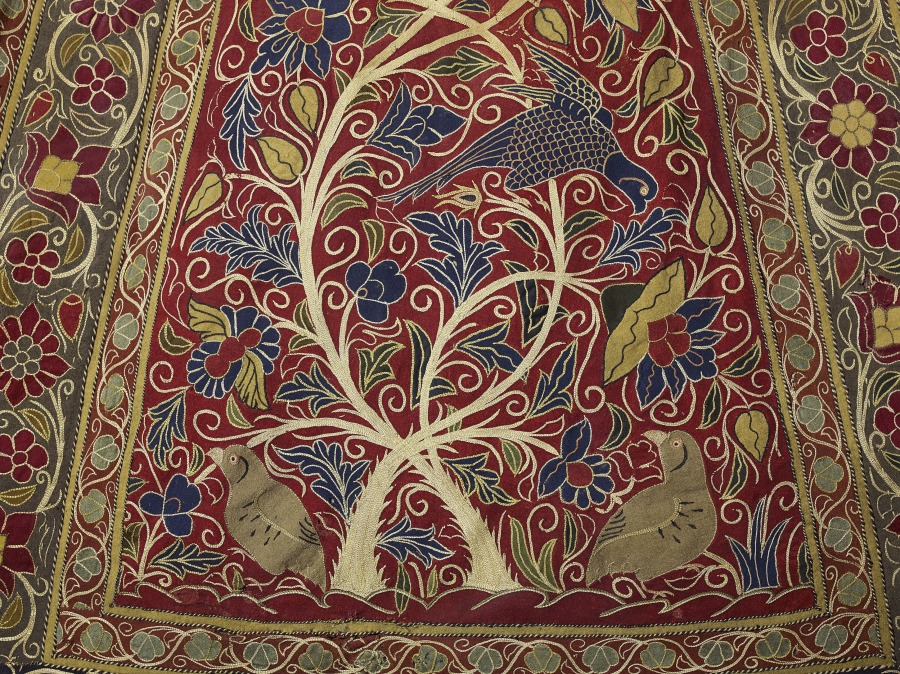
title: Royal Round Tent made for Muhammad Shah (Roof)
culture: Iran, Rasht, Qajar period (1779-1925)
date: 1834–48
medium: Interior: wool: plain weave, inlaid work; silk: embroidery, chain stitch; tape, leather; Exterior: cotton, wool: plain weave; rope, iron ring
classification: Textile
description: Royal tents were potent symbols of authority, wealth, and power throughout the greater Middle East. Rulers owned thousands of tents. They were used for shelter, shade, and innumerable functions in tent compounds that were essential for imperial ceremonies, travel, and military campaigns. Distinguished by size with elaborately decorated interior walls and ceilings, tents could be as large as castles. Opulent tents were also presented as imperial gifts. Tents are only known through documents before 1600. For example, in Baghdad in 809, Caliph Harun al-Rashid owned 4,000 ceremonial tents and 150,000 camping tents that were stored in the imperial Abbasid treasury. An astonishing variety and quantity of tents were housed in the royal Fatimid tent storeroom in Cairo in 1068-69, including "military tents, fortress tents, and castle tents, manufactured of . . . gold-brocaded stuff embroidered with designs of elephants, wild beasts, horses, peacocks, birds." Since 1600, Ottoman Turkish tents with elaborate floral decoration have been preserved in Istanbul in the Topkapi Palace Museum and Military Museum, and in European collections as war booty, primarily from the Ottoman Turks' attempt to conquer Vienna in 1683. These tents are not done in the Rasht technique, but rather are applique. In contrast, royal tents from Iran are extremely rare. This spectacular ceremonial tent is embroidered with the name of its owner, Muhammad Shah, who ruled Iran from 1834 to 1848 during the Qajar dynasty. The radiant jewellike interior features exuberant flora, blossoming vines, and robust birds made with colored wool embellished with silk-thread embroidery.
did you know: Rasht work is named after the city on the Caspian Sea in present-day Iran, which was a major silk trade center with numerous textile workshops.